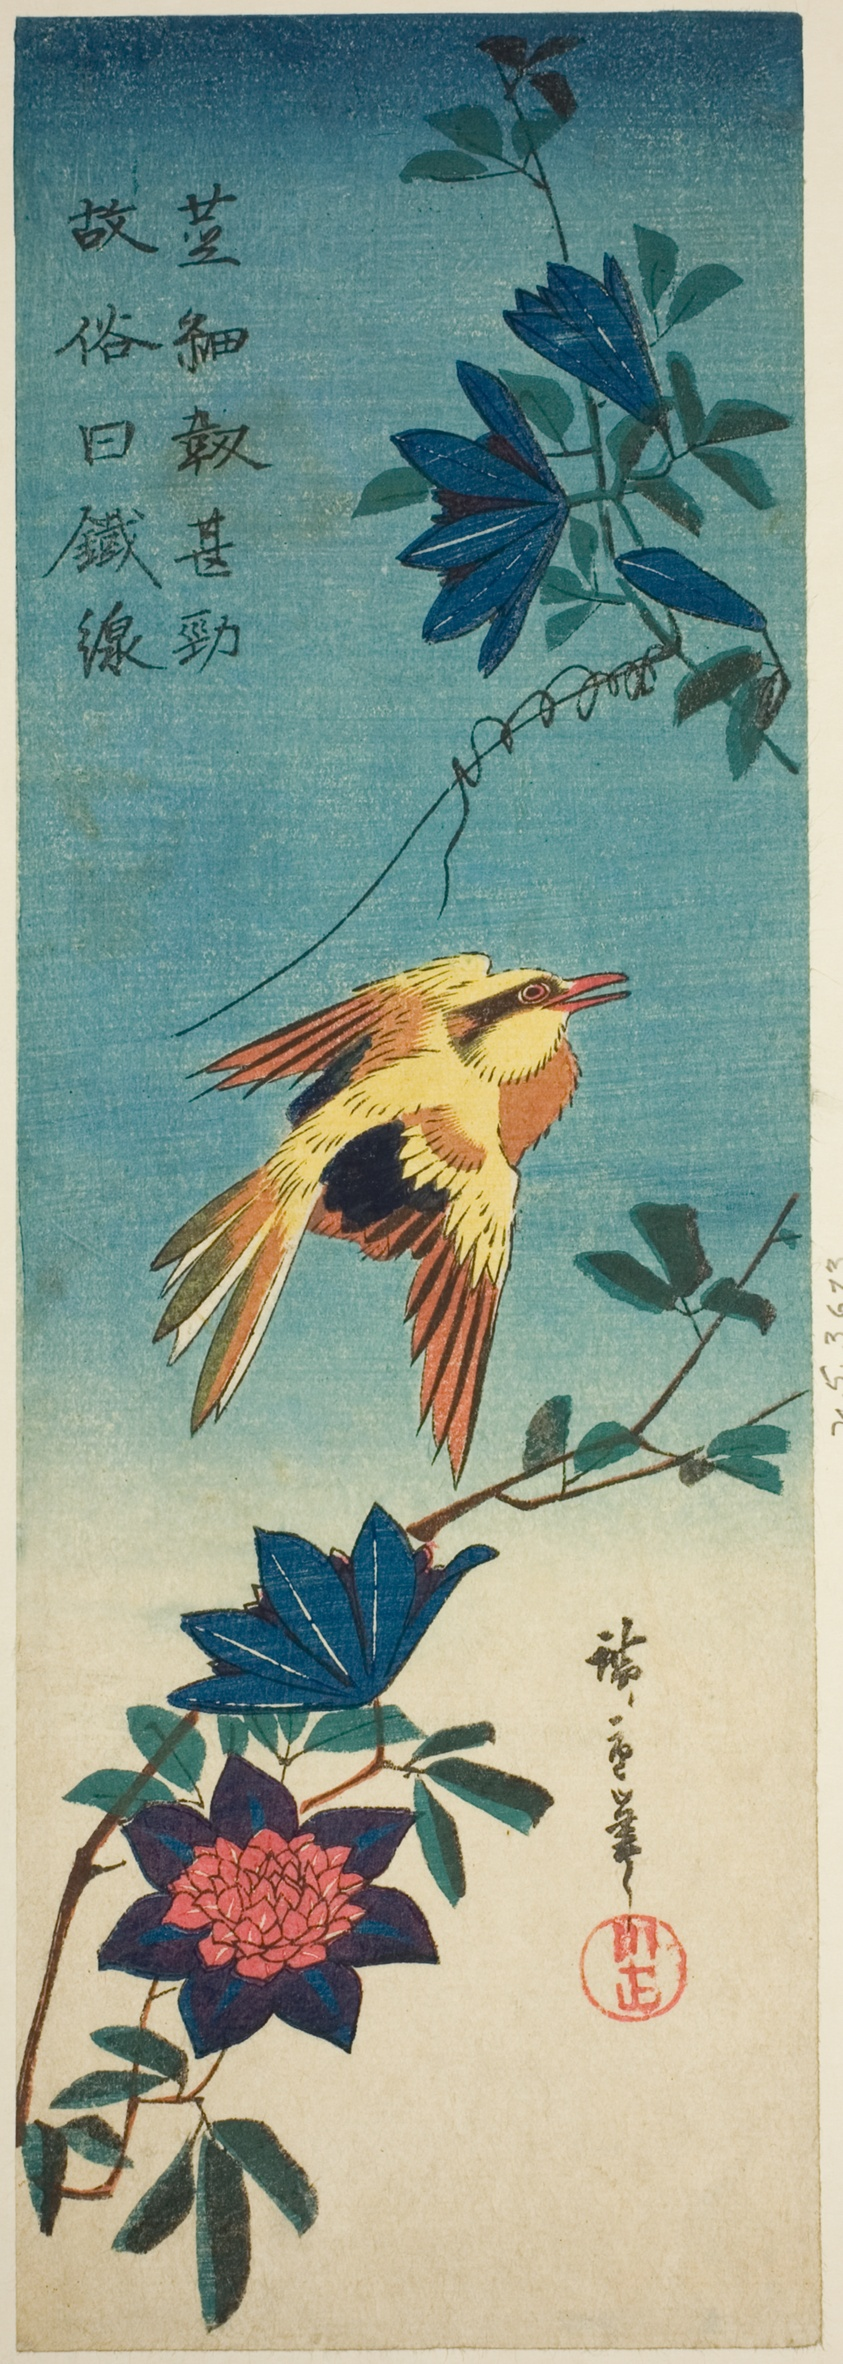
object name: Print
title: (Facsimile?) Black-naped oriole and clematis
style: Japanese (culture or style)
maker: Utagawa Hiroshige 歌川 広重; Japanese, 1797-1858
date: 1840s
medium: Color woodblock print; aitanzaku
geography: Japan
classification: woodblock print; print; asian art